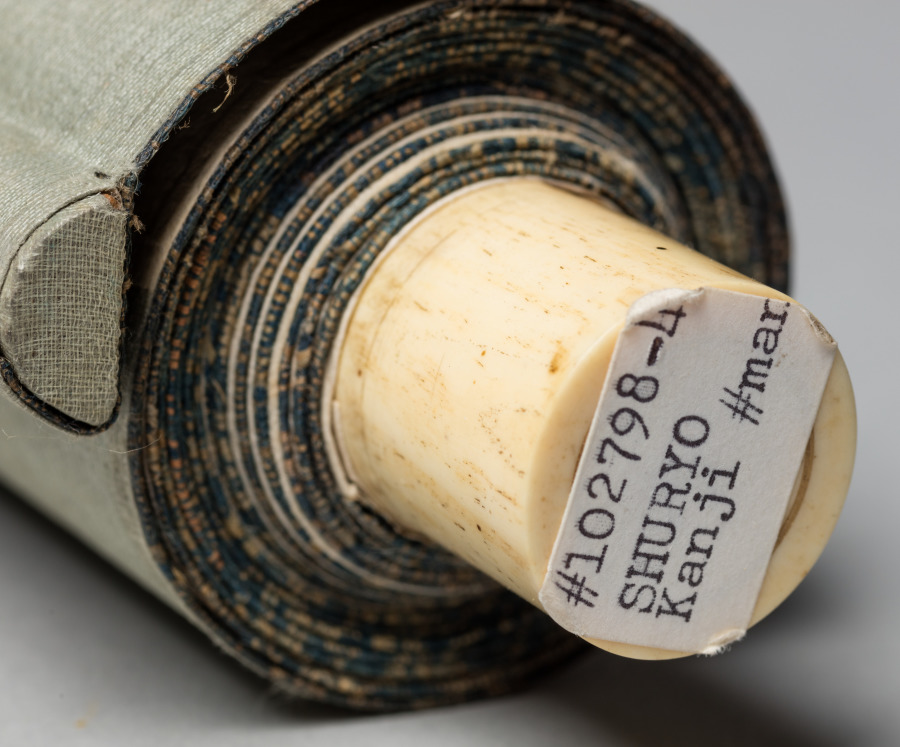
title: Sacred Name of Tenjin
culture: Japan, Muromachi period (1392–1573)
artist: Sakugen Shūryō (Japanese, 1501–1579)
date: 1500s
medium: hanging scroll; ink on paper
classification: Calligraphy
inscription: signed: signature unread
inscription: Sealed: Sakugen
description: The story emerged in the early 1300s that the kami Tenjin had traveled to China and achieved enlightenment under a famous Buddhist meditation master. Paintings of the subject as well as written invocations of Tenjin’s name were highly valued by the monks of Japan’s Zen Buddhist communities, to which an invocation of Tenjin’s name brushed by Zen monk Sakugen Shūryō attests. Sakugen was both a poet and an official envoy to Ming China in the 1500s. Creating calligraphies of deities’ names was akin to painting religious icons.